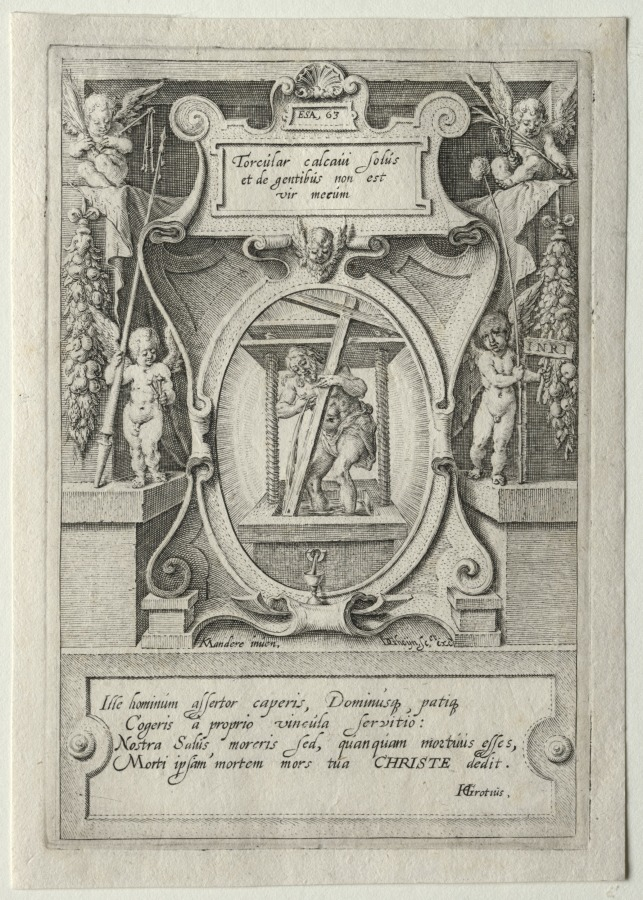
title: Passion Set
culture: Netherlands, 16th century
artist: Zacharias Dolendo (Dutch, 1561–1604)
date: 1596–98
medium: engraving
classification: Print